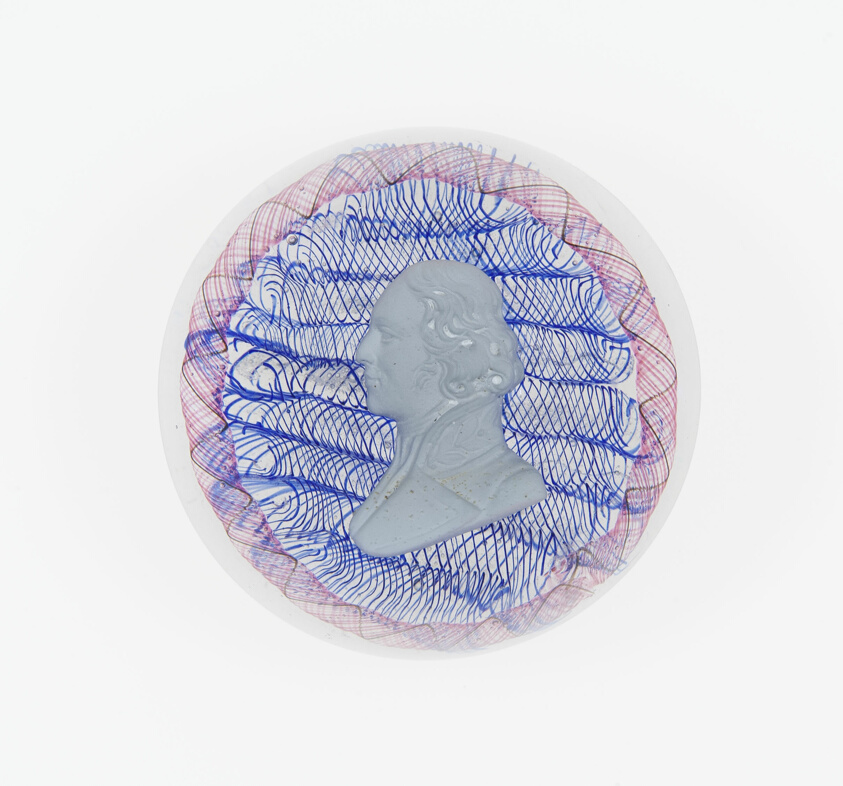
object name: Glass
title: Paperweight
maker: Clichy Glassworks (Cristalleries de Clichy); Clichy, France, 1837-1885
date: c. 1846–55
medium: Glass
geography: Clichy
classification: paperweight; sulphide (glass); european decorative arts; glass